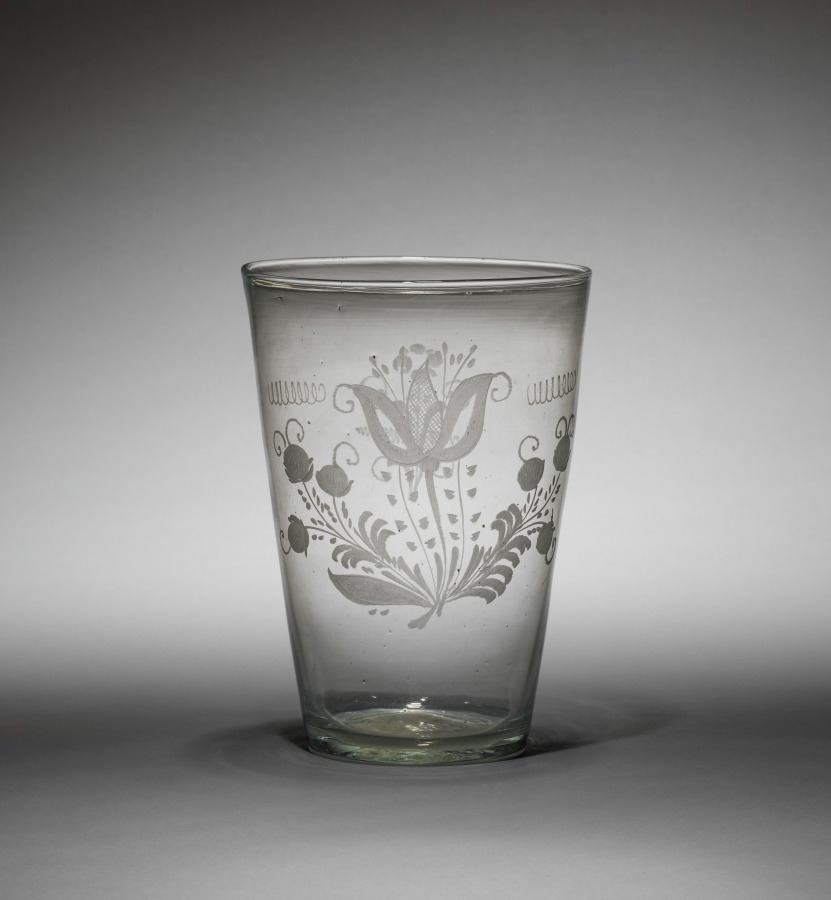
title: Flip Glass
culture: America, late 18th century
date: late 1700s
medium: glass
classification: Glass